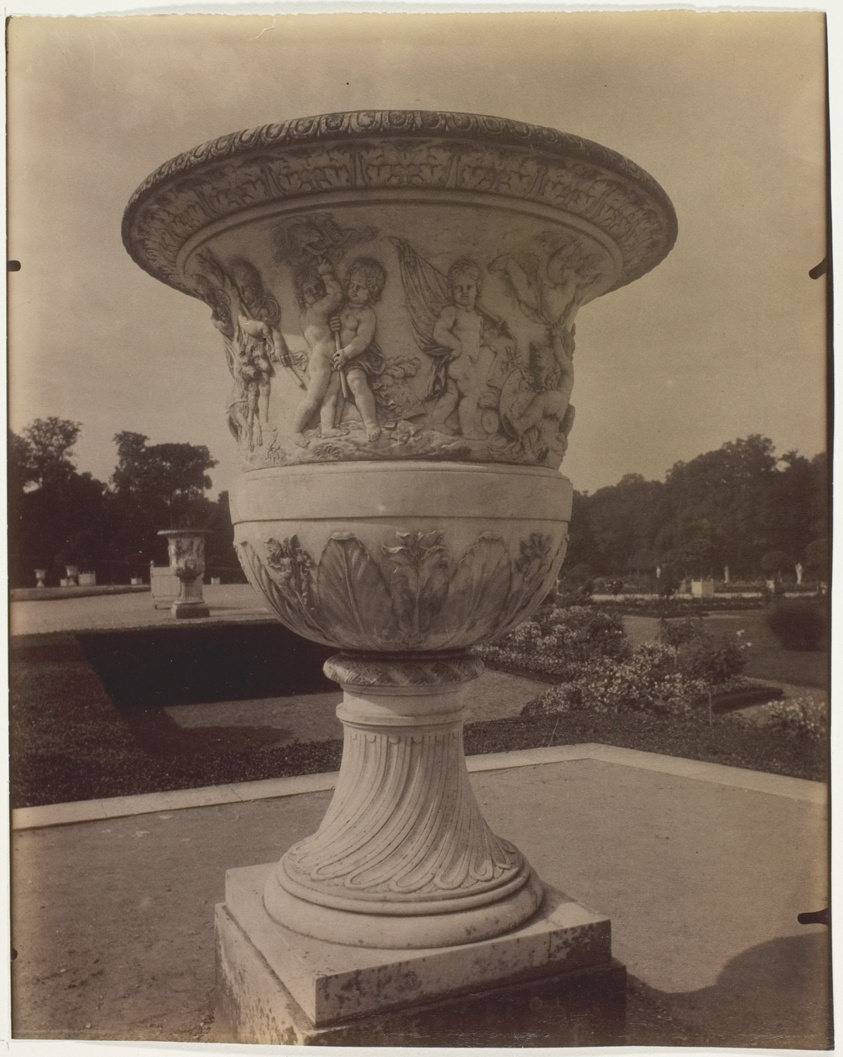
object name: Photograph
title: Versailles, Vase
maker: Jean-Eugène-Auguste Atget (French, 1857–1927)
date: 1905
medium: Albumen print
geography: France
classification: albumen silver print; photographic process; photography; photograph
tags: Collected by Hugh Edwards